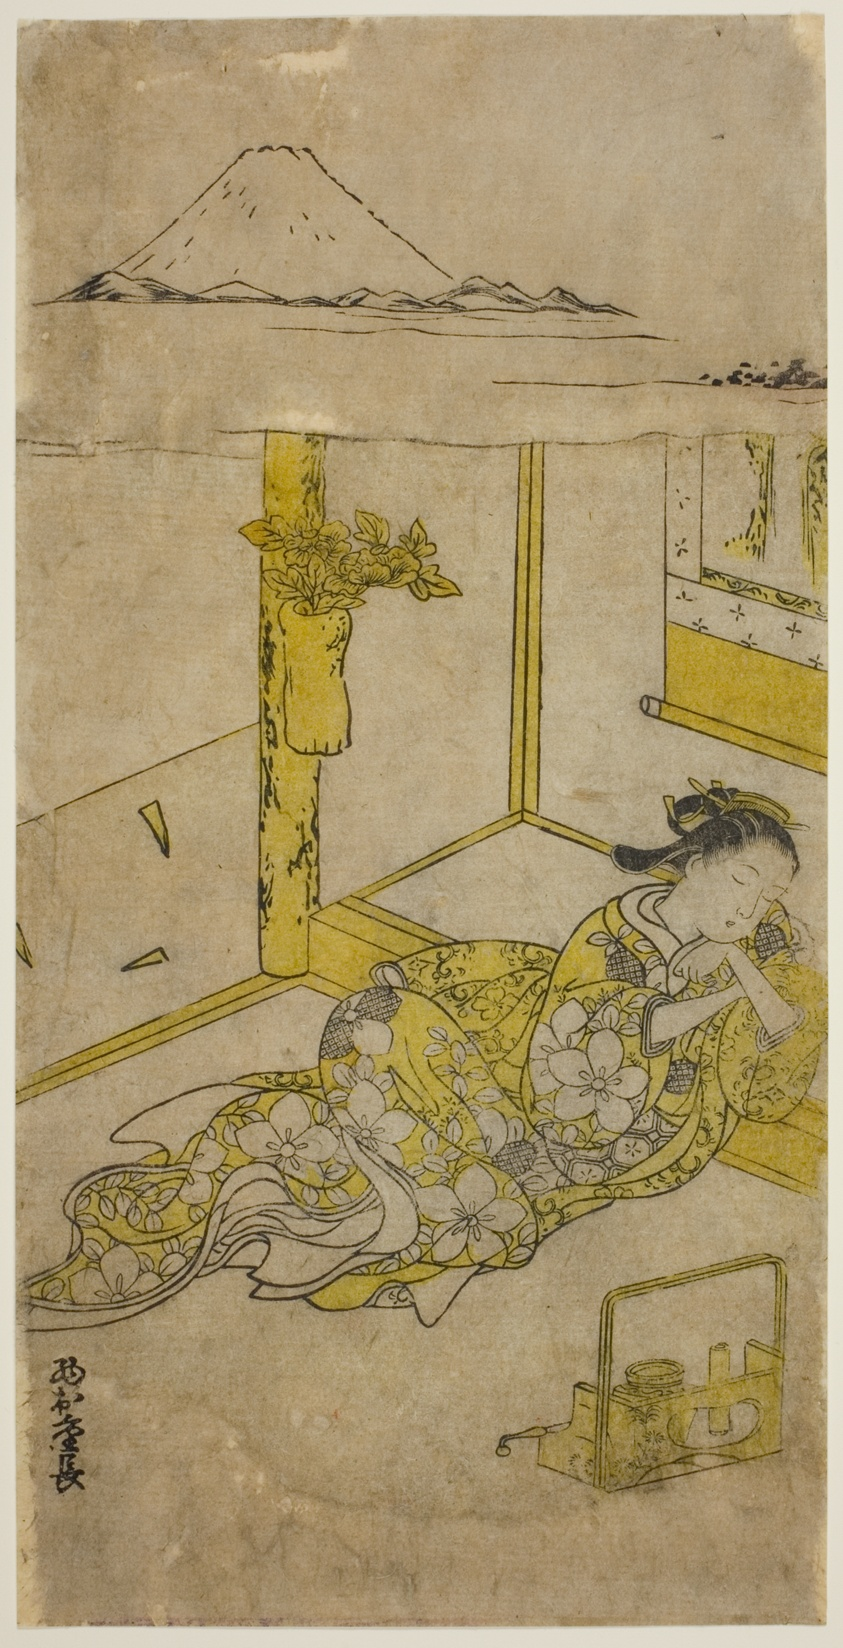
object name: Print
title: Sleeping Young Woman with Mt. Fuji Above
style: Japanese (culture or style)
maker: Nishimura Shigenaga (Japanese, 1697 (?)-1756)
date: c. 1740s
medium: Hand-colored woodblock print; hosoban, sumizuri-e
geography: Japan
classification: woodblock print; print; asian art